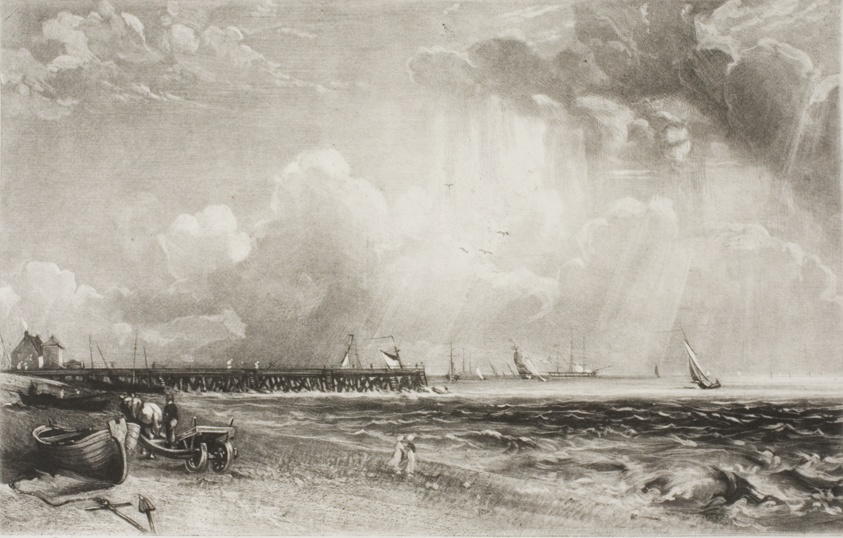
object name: Print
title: Yarmouth, Norfolk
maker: David Lucas (English, 1802-1881); after John Constable (English, 1776-1837)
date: 1832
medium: Mezzotint in black ink on heavy ivory wove paper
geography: England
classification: mezzotint; print; prints and drawing